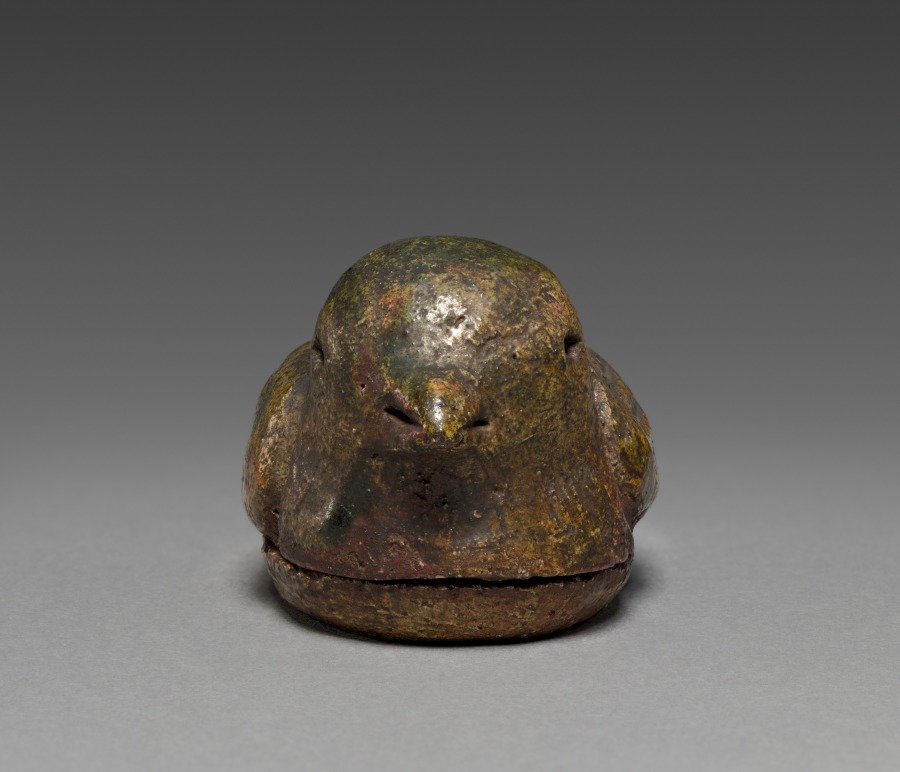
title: Incense Container (Kōgō) in the Shape of a Bird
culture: Japan, Edo period (1615–1868)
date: c. 1700–1868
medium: Stoneware with glaze and carved decoration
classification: Ceramic